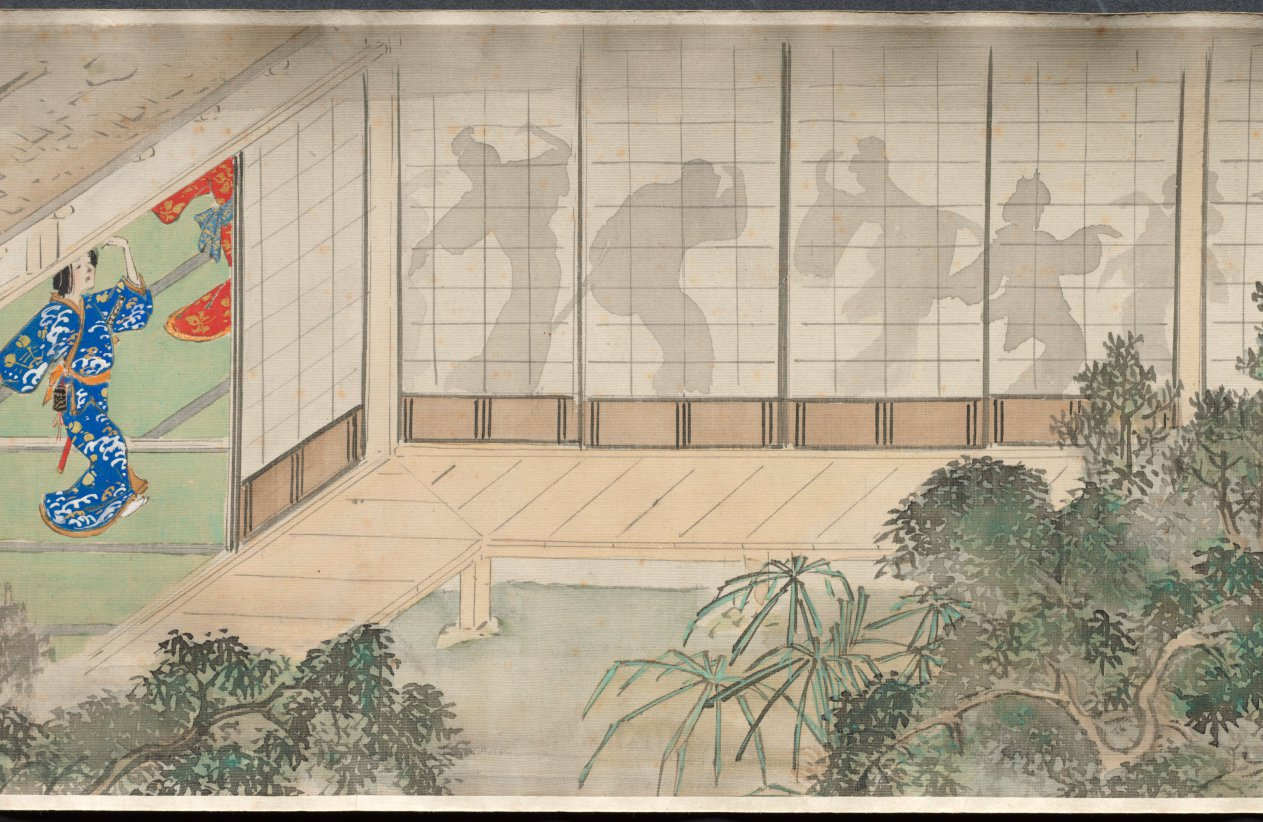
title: The Shadow Dancers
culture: Japan, Edo period (1615–1868)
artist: Yamamoto Baiitsu (Japanese, 1783–1856)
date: 1800s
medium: handscroll, ink and color on silk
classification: Painting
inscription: artist's signature and two seals at end of painting.